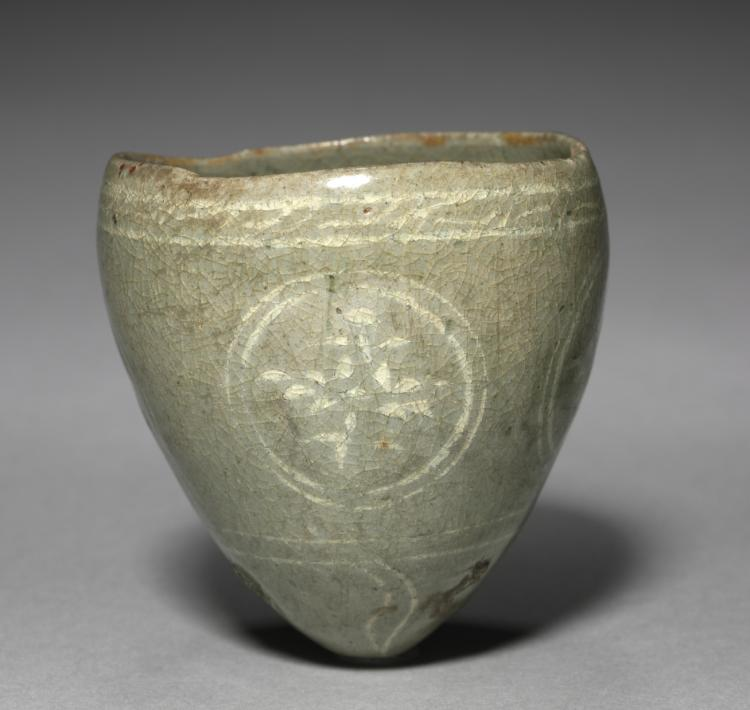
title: Cup with Inlaid Chrysanthemum Design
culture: Korea, Goryeo dynasty (918–1392)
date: 1200s-1300s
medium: pottery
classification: Ceramic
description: Toward the late 14th century, the overall quality of techniques involved in making celadon works sharply deteriorated. In contrast to translucent greenish blue celadon works of the 12th century, this drinking cup possibly dated to the late 14th century, has gray greenish glaze. And its inlaid design also shows a clear sign of decline in craftsmanship. Nevertheless, less attention to techniques gave a way to a freer style of pottery called buncheong in the succeeding centuries.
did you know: This distinctively shaped cup with a pointy base is known to have been used on horseback.